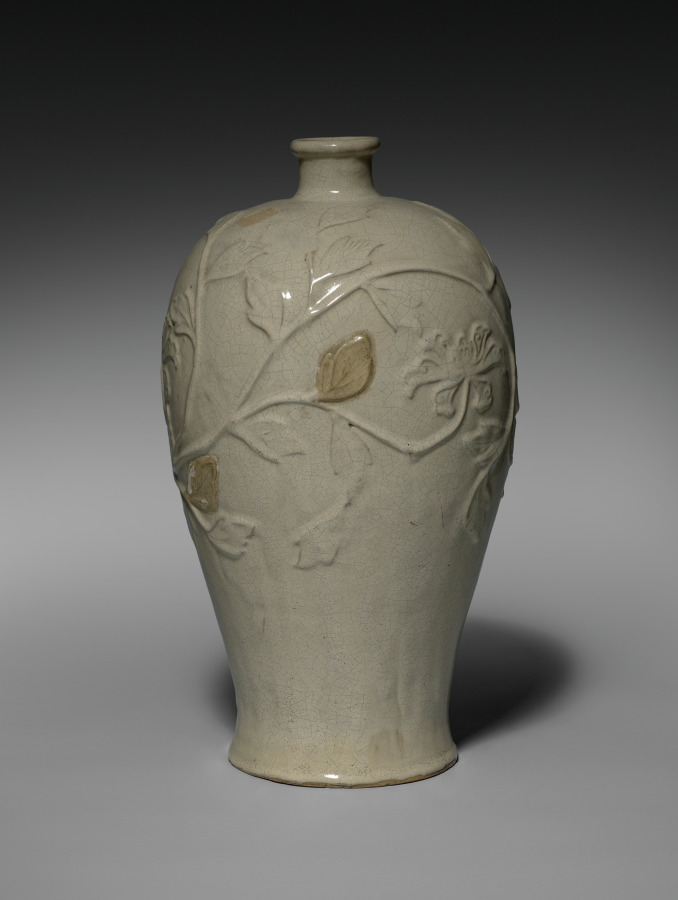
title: Jar: Kuang Tung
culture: China, Qing dynasty (1644-1911)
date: 1644–1911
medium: porcelain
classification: Ceramic